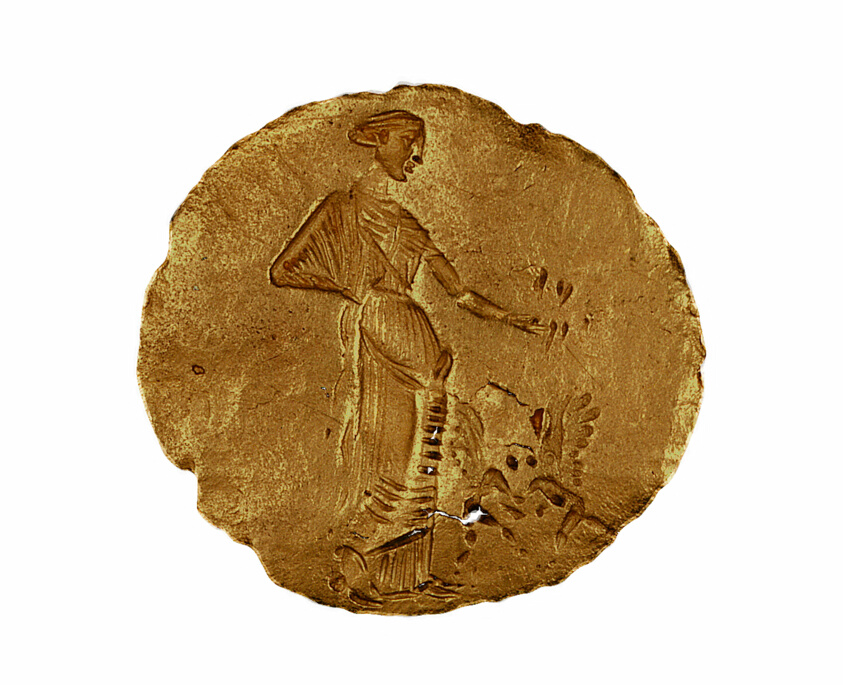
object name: Costume and Accessories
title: Finger Ring Depicting Aphrodite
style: greek, ancient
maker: Greek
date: late 4th century BCE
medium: Gold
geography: Ancient Greece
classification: ring (jewelry); unidentified; jewelry; ancient art; costume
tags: goddesses, gods (deities)